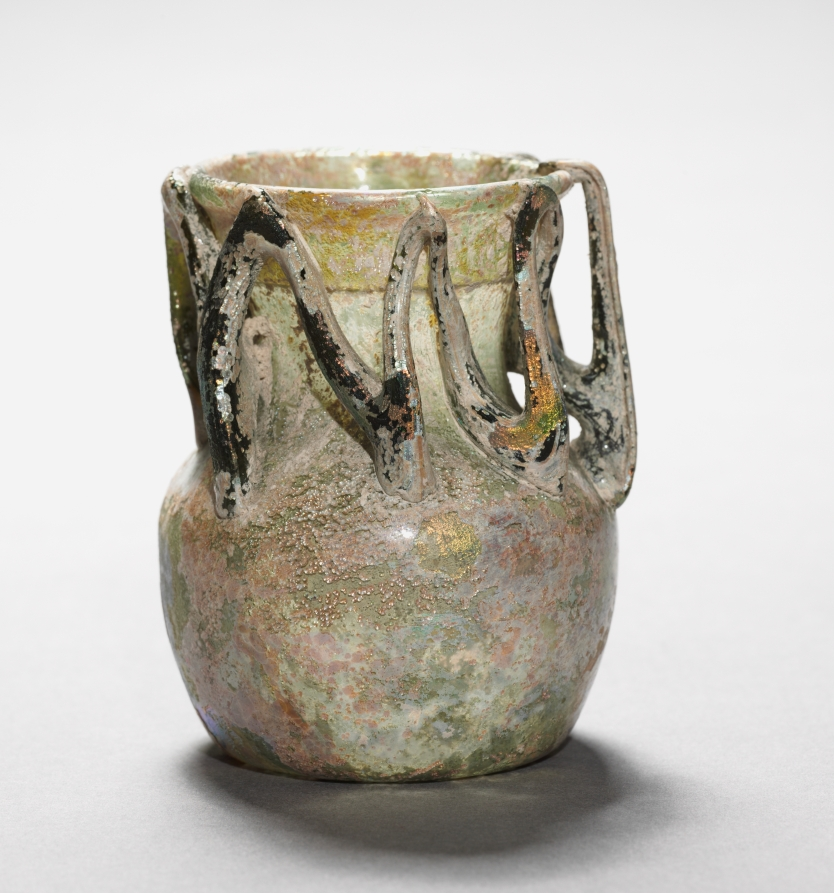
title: Vase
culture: Italy, Roman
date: 100–300 CE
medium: glass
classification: Glass